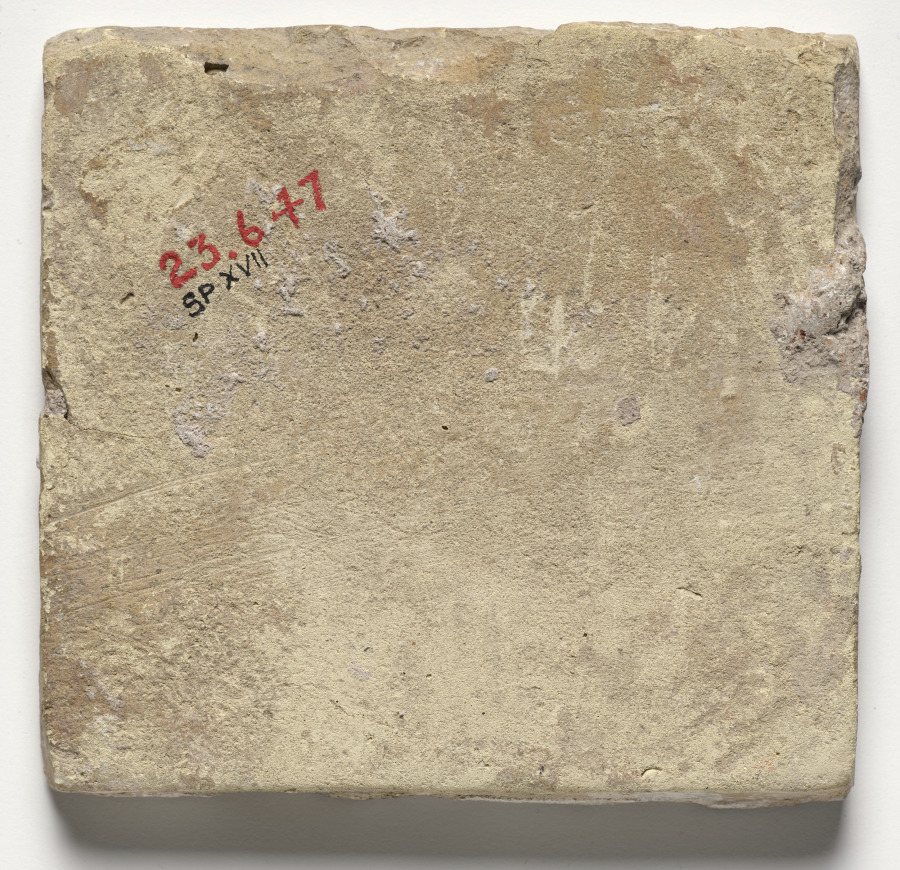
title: Wall Tile–Building with Tower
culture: Spain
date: c. 1600s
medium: glazed ceramic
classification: Ceramic